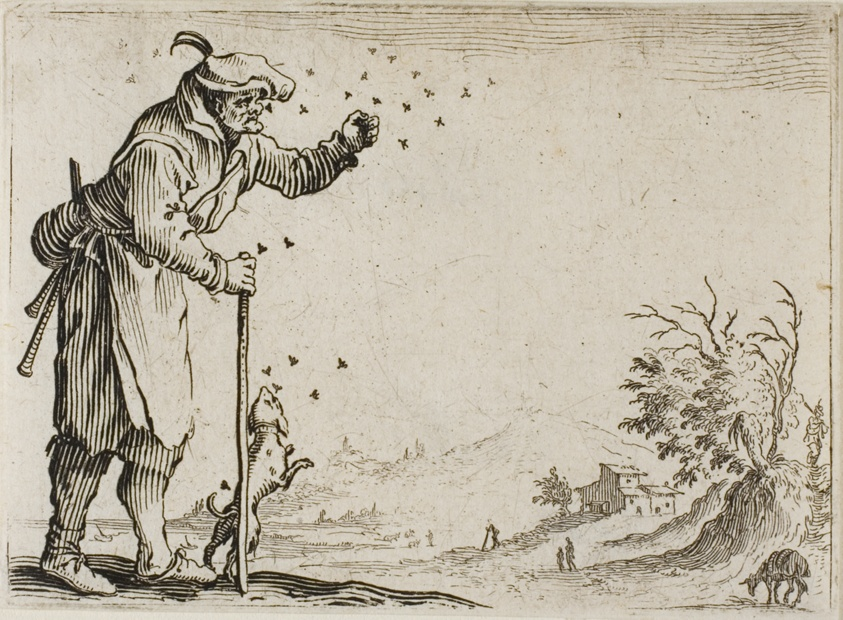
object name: Print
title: The Peasant Attacked by Bees, from The Caprices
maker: Jacques Callot (French, 1592-1635)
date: c. 1622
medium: Etching on ivory laid paper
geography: France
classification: etching; print; prints and drawing